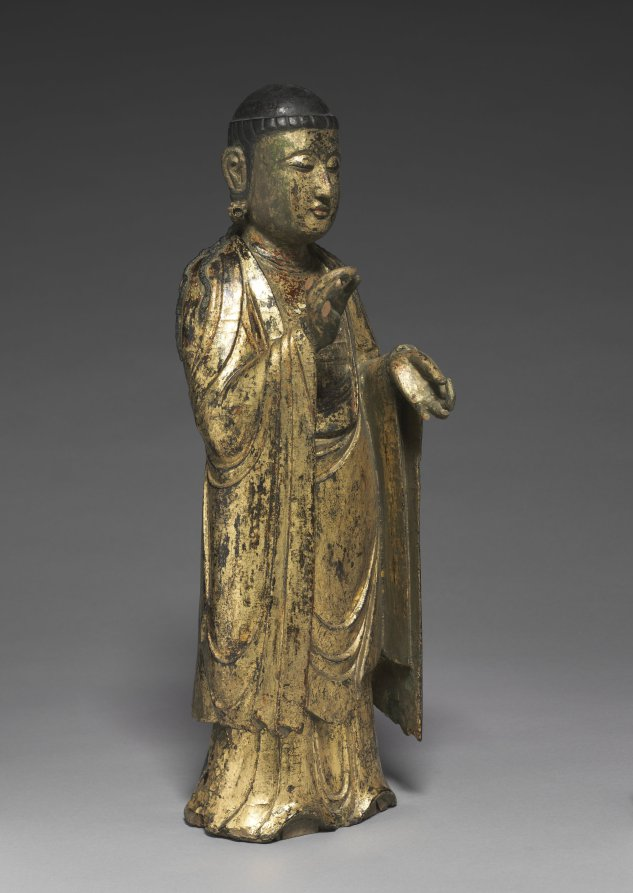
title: Standing Bodhisattva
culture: Korea, Joseon dynasty (1392–1910)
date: 1500s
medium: wood with lacquer and gold, and metal earrings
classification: Sculpture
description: This work demonstrates the enduring presence of Buddhism and its religious practice during the Joseon dynasty (1392–1910) even after Neo-Confucianism, a revised form of Confucianism that emphasized self-cultivation as a path to the formation of a harmonious society and state, became the state religion. Because of its missing crown, it is hard to identify what Buddhist deity this statue represents. But there is no doubt it still can be attributed to a bodhisattva (meaning “enlightened being”) for its iconographic attributes: elaborate jewelry and a lock of long hair.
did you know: This Buddhist statue is missing its crown, which makes it hard to identify what deity it represents.